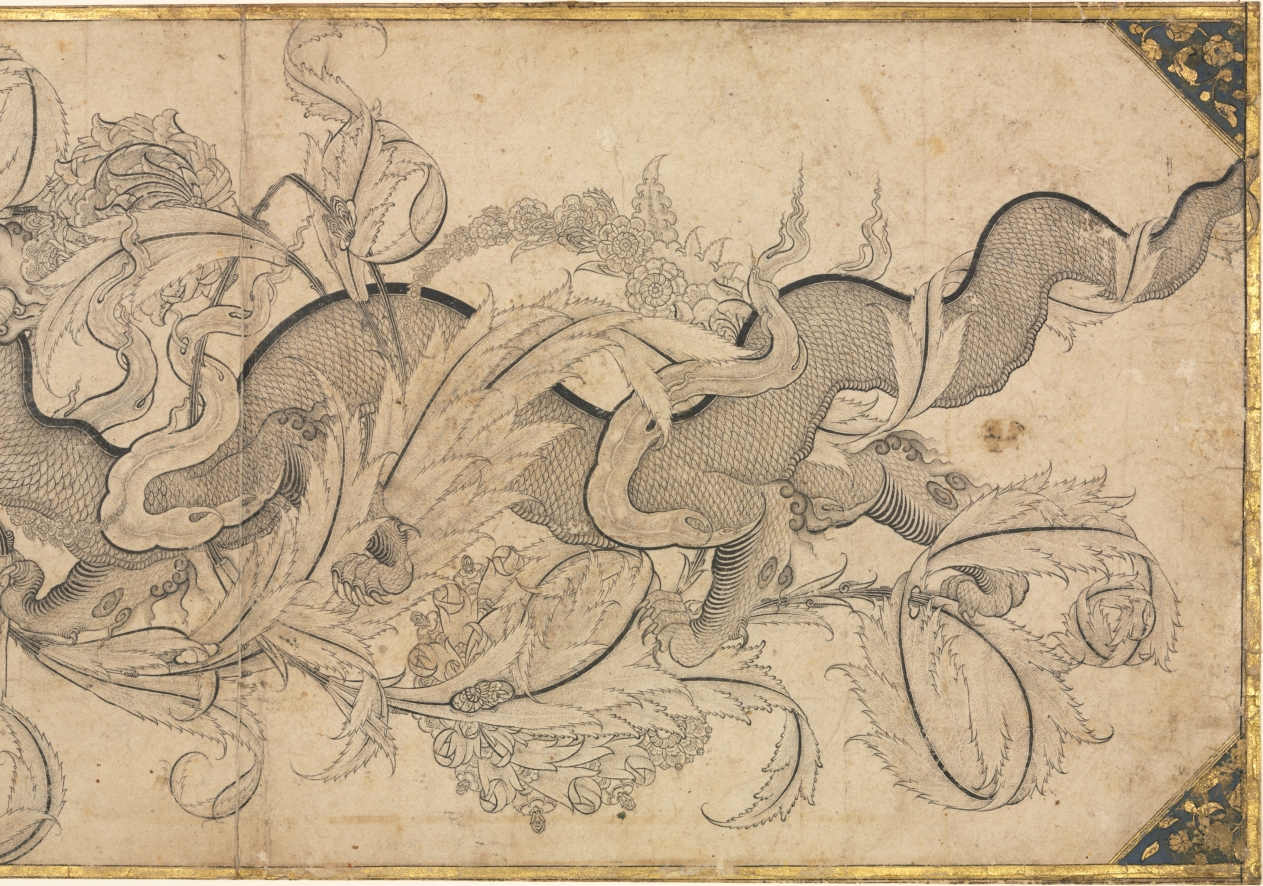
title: Dragon in foliage with lion and phoenix heads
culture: Ottoman Turkey, Istanbul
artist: attributed to Sahkulu (Turkish, active 1526–56)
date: mid-1500s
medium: Ink, gum tempera, and gold on paper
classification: Drawing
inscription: [stamp between dragon and phoenix, in Naskh script] And I commit my case unto God. [Qur’an 40:44]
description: A dragon lunges toward a pearl in the form of a seal inscribed with a verse from the Koran: “And I commit my case unto God” (40:44). In his front claw, the dragon grasps two flowering branches that magically produce a variety of blooms, including a lion that bites the dragon’s neck and a phoenix, who competes for the pearl. Sahkulu was trained by Persian artists, as were many artists of Mughal India during the 1500s. He joined the Ottoman imperial painting atelier in Istanbul in 1526 and became the head in 1545.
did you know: The lion head and phoenix head are part of the foliage, like fantastical blossoms.